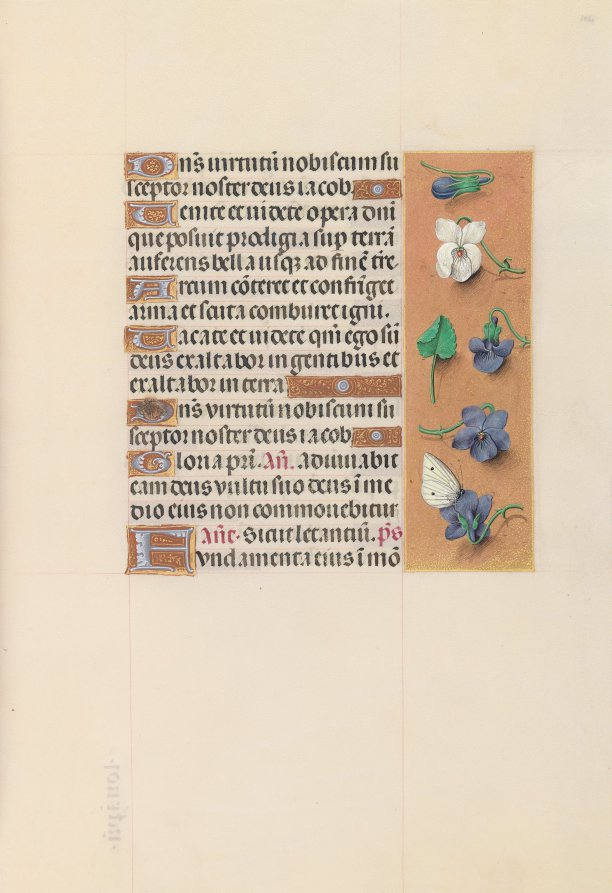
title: Hours of Queen Isabella the Catholic, Queen of Spain: Fol. 106r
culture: Flanders, Ghent and Bruges, late 15th century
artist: Master of the First Prayerbook of Maximillian (Flemish, c. 1444–1519)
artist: and Associates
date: c. 1500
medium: ink, tempera, and gold on vellum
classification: Bound Volume